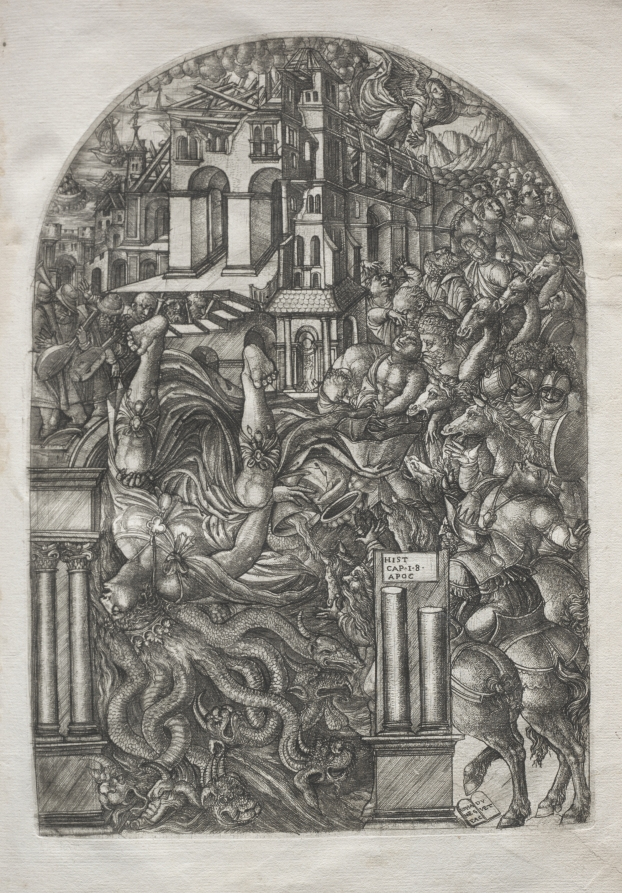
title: The Apocalypse: The Fall of Babylon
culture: France, 16th century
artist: Jean Duvet (French, 1485–1561)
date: 1546–1556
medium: engraving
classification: Print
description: This print is part of a bound volume of works illustrating the a narrative of the Apocalypse, taken from the Revelation of Saint John in the Bible. The 23 engravings in the series occupied the artist for a number of years and represent his greatest artistic achievement. The museum's volume is one of only seven known complete sets. Jean Duvet was one of the first major printmakers in France and one of the most original artists of the 1500s. Although he worked mostly in the provincial city of Langres, he became aware of Italian art through the circulation of prints—notably those of Marcantonio Raimondi. His solidly modeled human figures reflect the influence of the Italian High Renaissance. Duvet, however, developed an idiosyncratic, highly artificial style with crowded compositions that ignore rational space in favor of ornamental surface patterns.